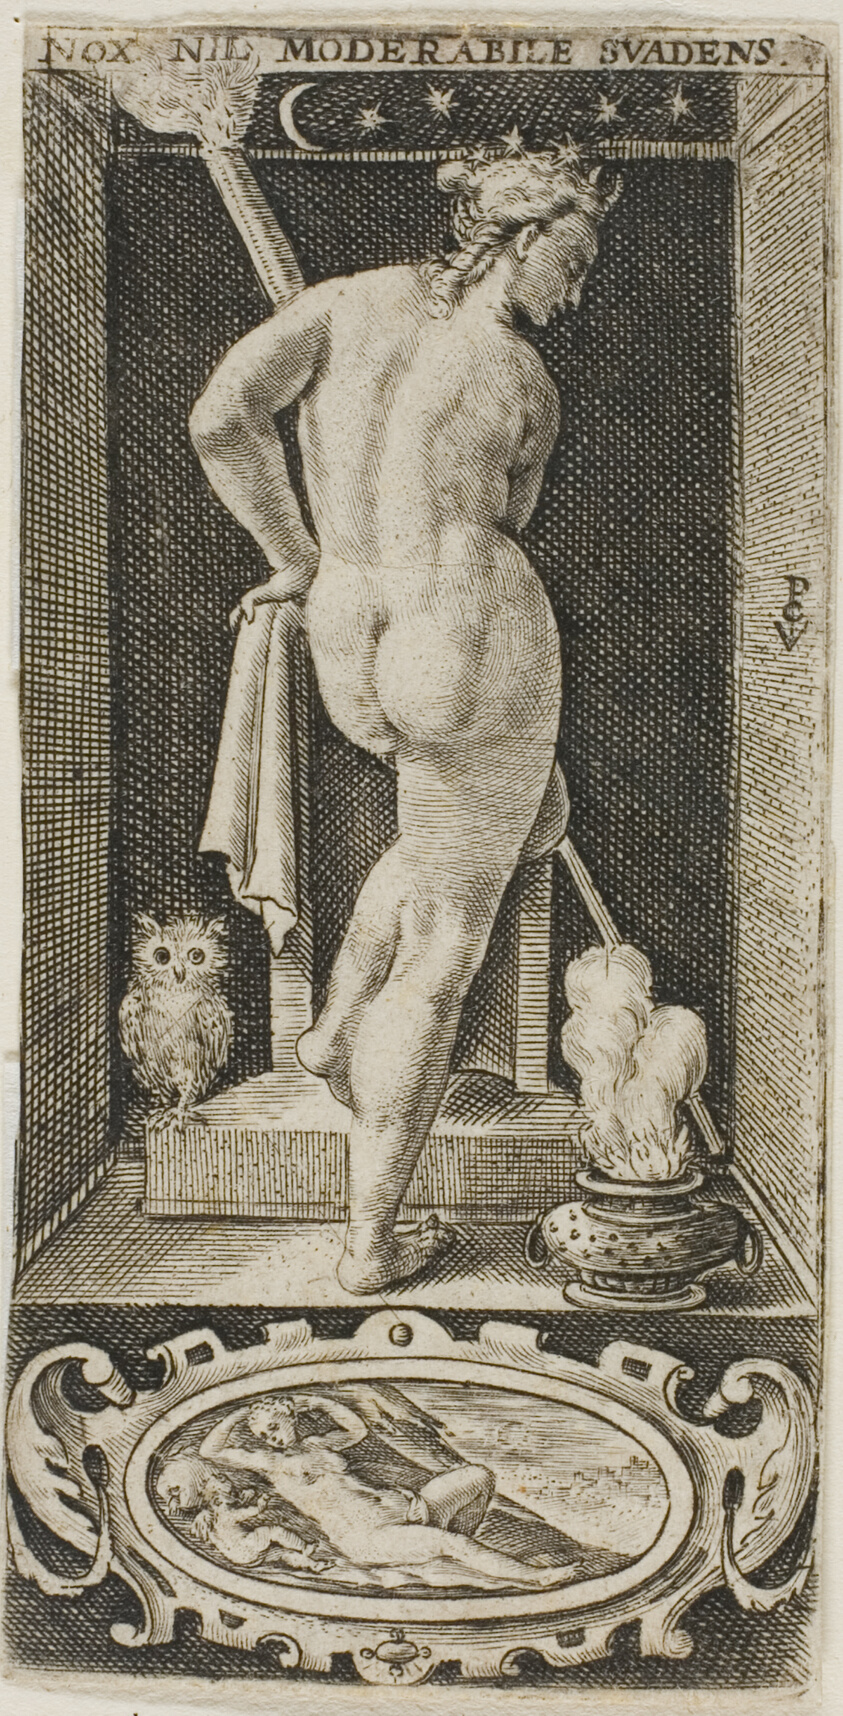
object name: Print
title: Night, plate four from The Four Parts of the Day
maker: Crispijn van de Passe, the elder; Dutch, c. 1564–1637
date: c. 1580-1630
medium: Engraving on paper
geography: Holland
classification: engraving; print; prints and drawing